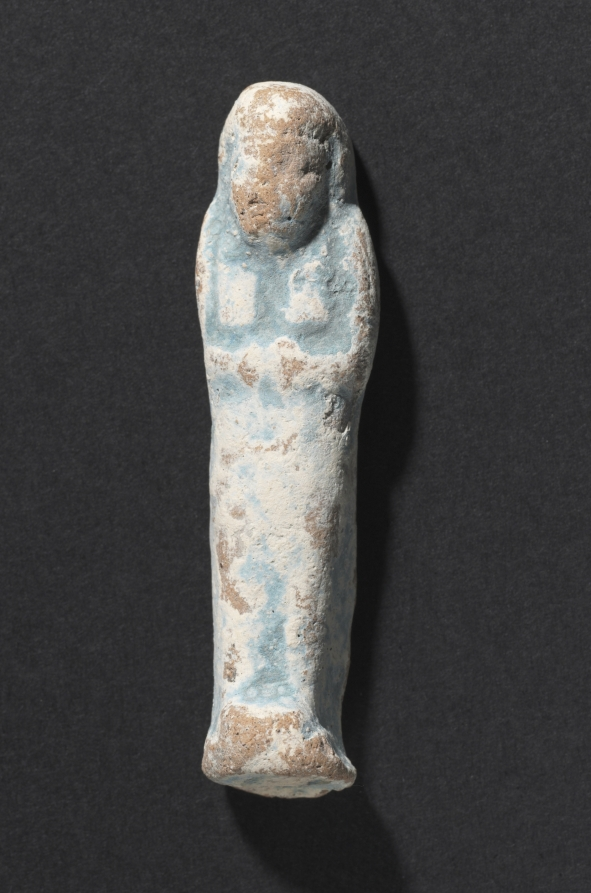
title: Shawabty of Ditamenpaankh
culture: Egypt, Late period (715–332 BCE), Dynasty 25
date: 715–656 BCE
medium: terracotta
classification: Funerary Equipment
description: High demand for shawabtys in the Late Period, a time when as many as 400 or more shawabtys were placed in the tomb with the deceased, gave rise to a specialized container for storing them: the shawabty box. This example is inscribed for the lady of the house, Ditamenpaankh, and was probably one of a pair originally made for her. The single-masted boat on the box's lid is perhaps an allusion to the pilgrimage of the deceased to the holy city of Abydos, the cult city of Osiris, king of the dead. The shawabtys inside are crude, mass-produced examples cast in an open mold. Made of terracotta, their blue paint imitates more costly shawabtys made of faience. As for the shawabty spell, it has been removed from its traditional location on the shawabty's front and relocated onto the sides of box, where it needed only to be written once, thus expediting production.